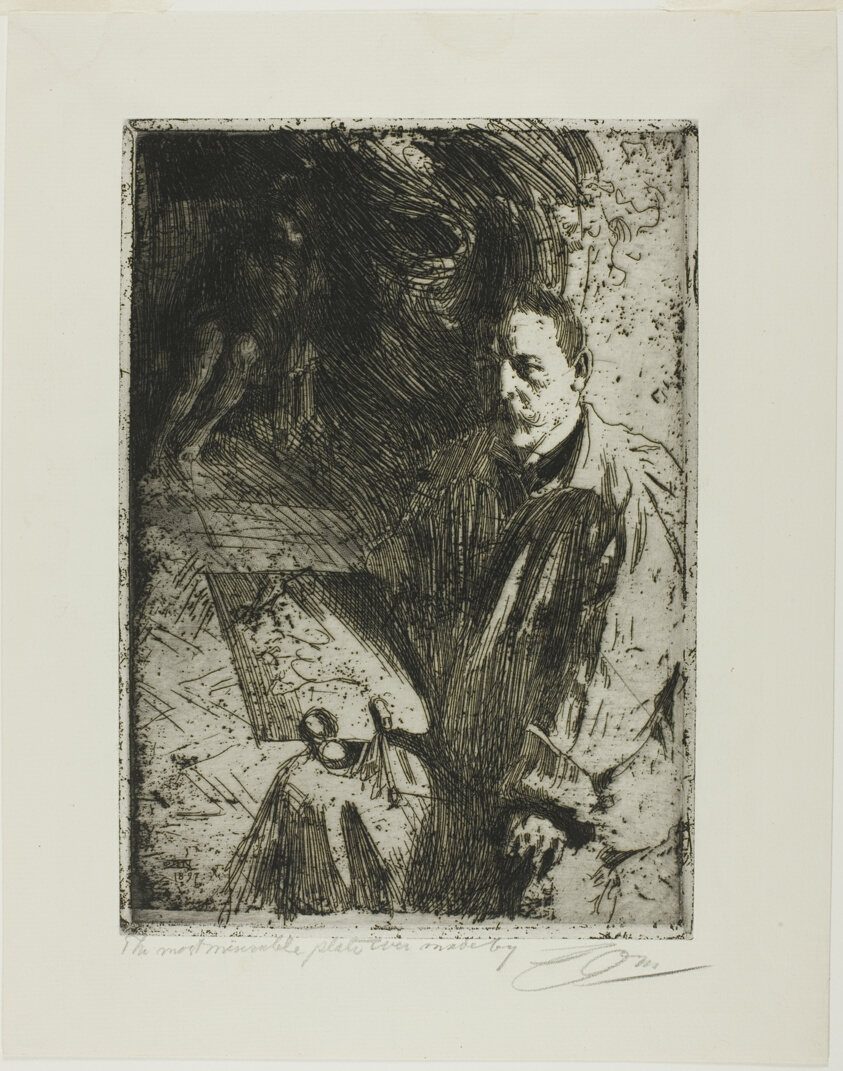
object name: Print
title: Zorn and His Model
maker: Anders Zorn (Swedish, 1860-1920)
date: 1897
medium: Etching on ivory laid paper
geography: Sweden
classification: etching; print; prints and drawing